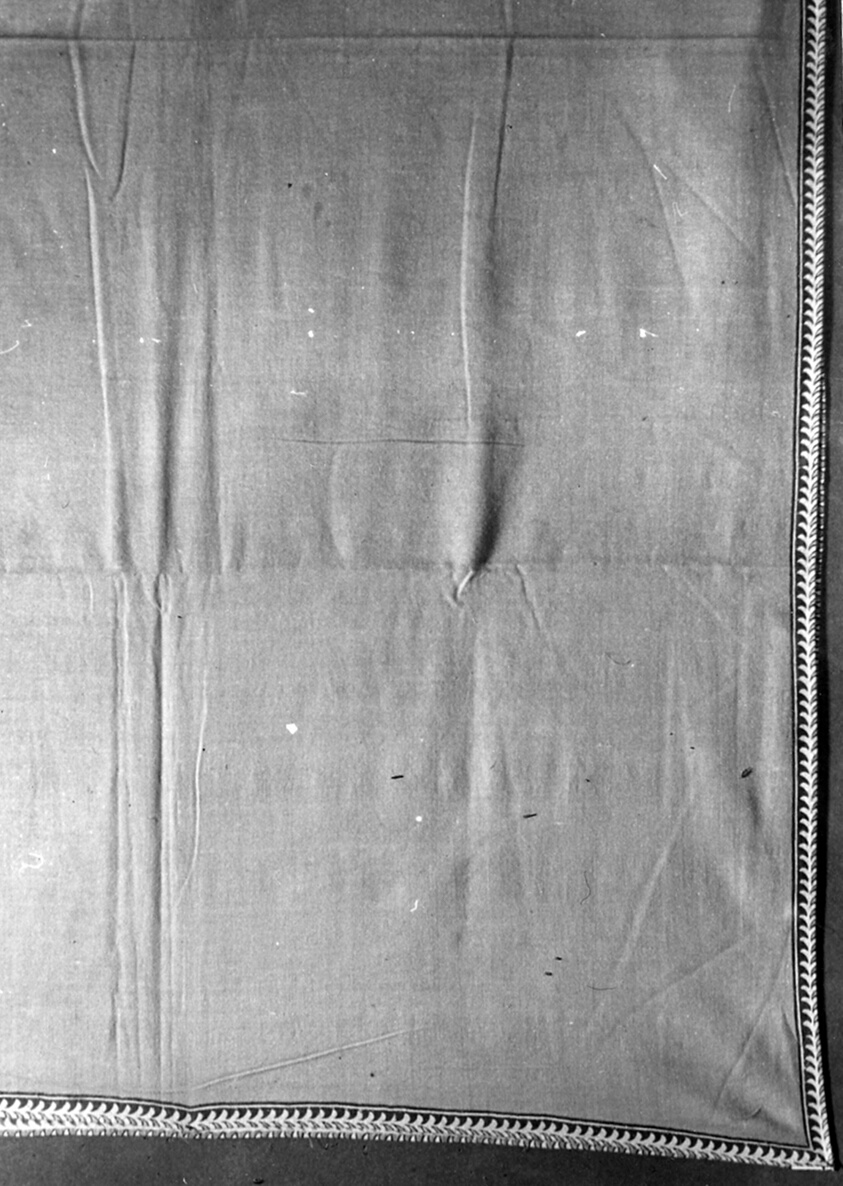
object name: Textile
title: Handkerchief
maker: France, Alsace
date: 1801/25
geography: France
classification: textile; weaving - printed; accessories (object genre)